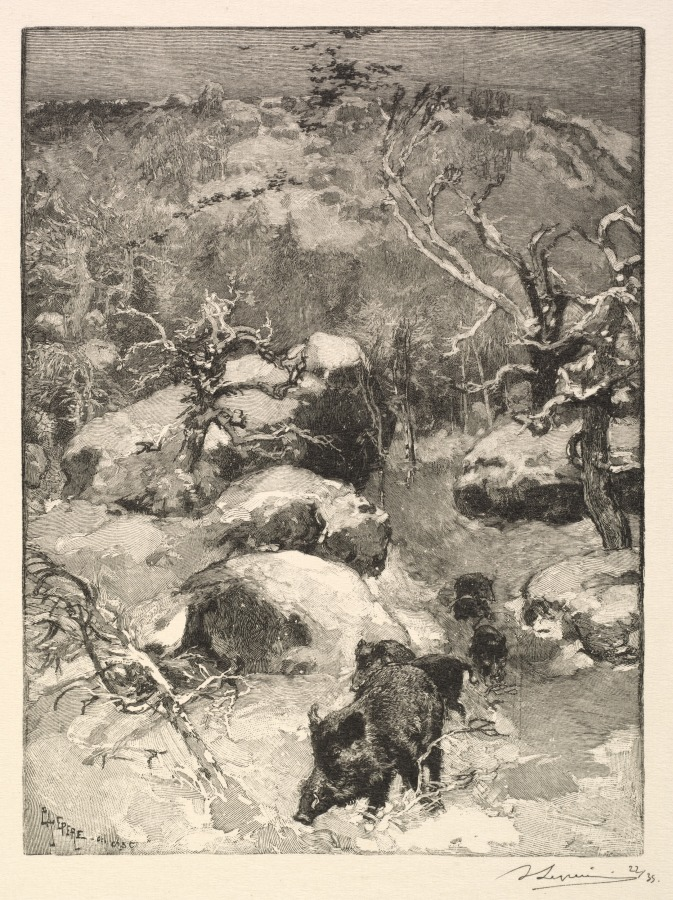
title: Fontainebleau Forest: Cuvier-Châtillon Cliff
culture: France, 19th century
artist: Auguste Louis Lepère (French, 1849–1918)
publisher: A. Desmoulins, Published in Revue Illustrée, 1887–90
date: 1890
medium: wood engraving from bound volume of 34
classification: Bound Volume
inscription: Below image, lower right, in black ink: ALepère 22/35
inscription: in block, lower left: A. LEPERE del. et sc.on window mat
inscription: lower right, in graphite: Roche Cuvier Châtillon